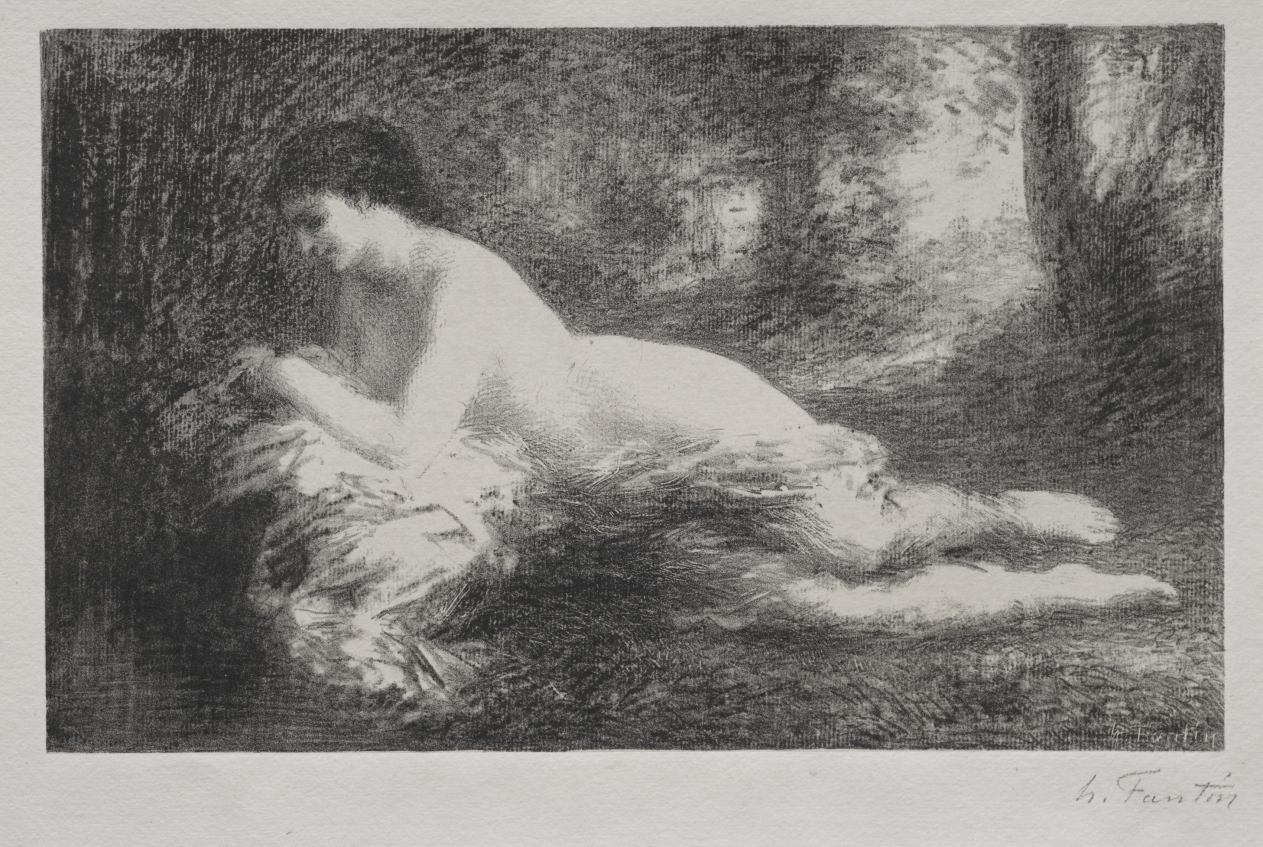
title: Réverie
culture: France, 19th century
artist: Henri Fantin-Latour (French, 1836–1904)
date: 1903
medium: lithograph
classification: Print